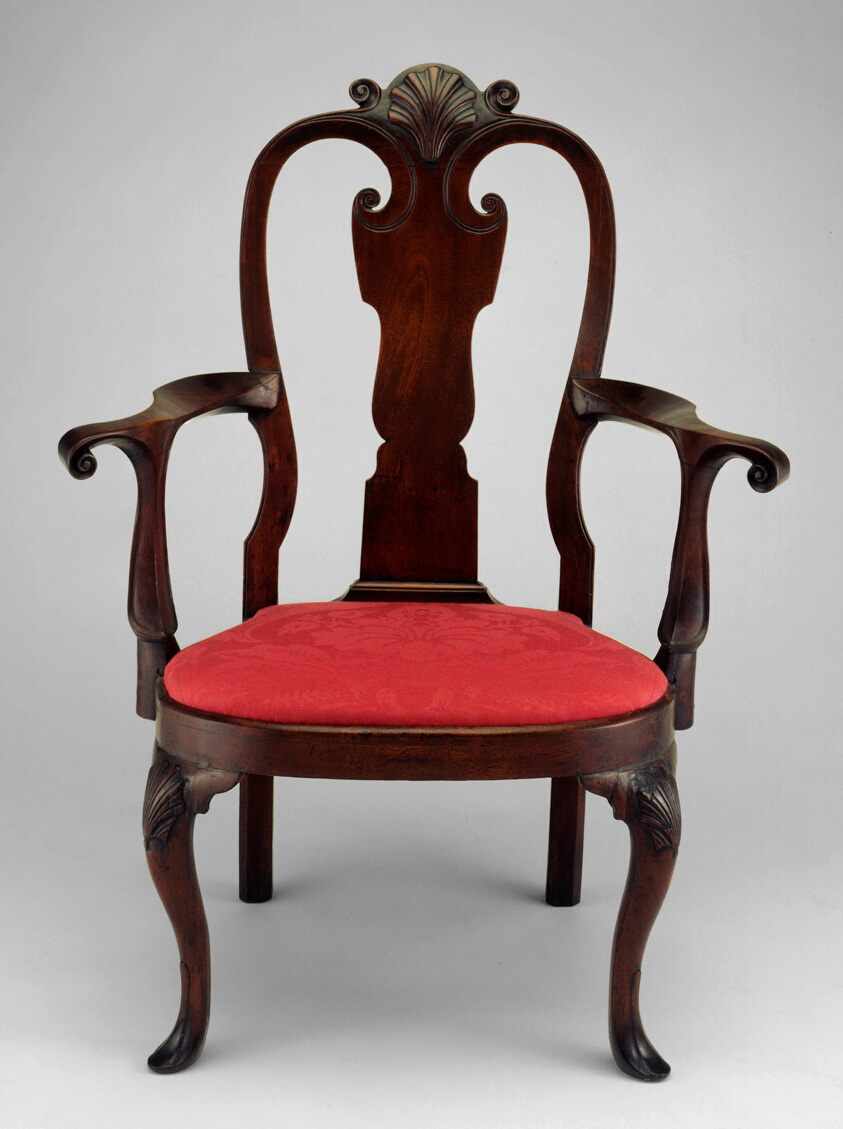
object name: Furniture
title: Armchair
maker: Artist unknown (American, 18th century); Philadelphia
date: c. 1740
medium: Walnut and upholstery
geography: Philadelphia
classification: seating; furniture; american decorative arts; american arts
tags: furniture